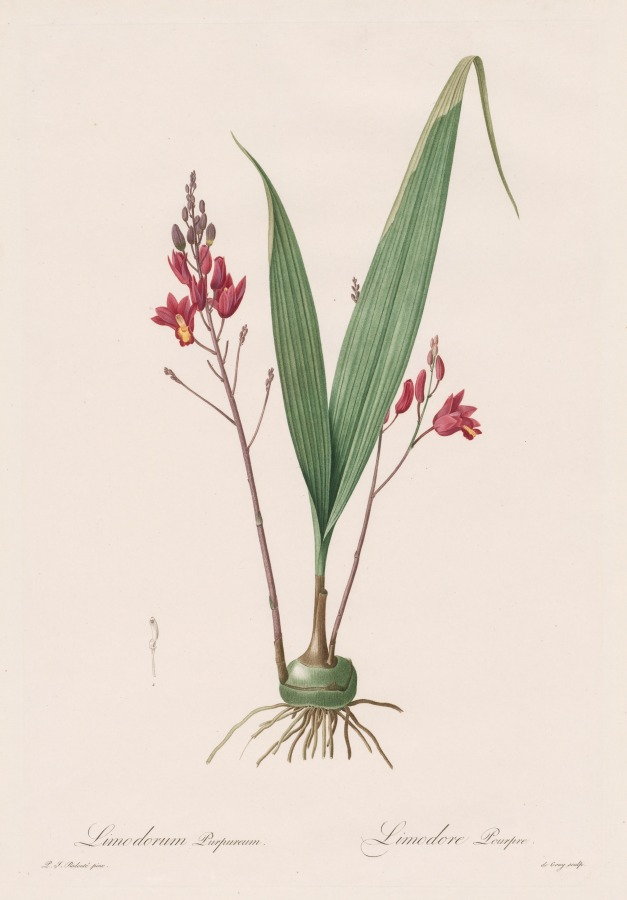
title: Les Liliacées: Limodorum purpureum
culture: France, 19th century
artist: Pierre-Joseph Redouté (French, 1759–1840)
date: 1802–16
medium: stipple and line engraving, with hand coloring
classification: Print